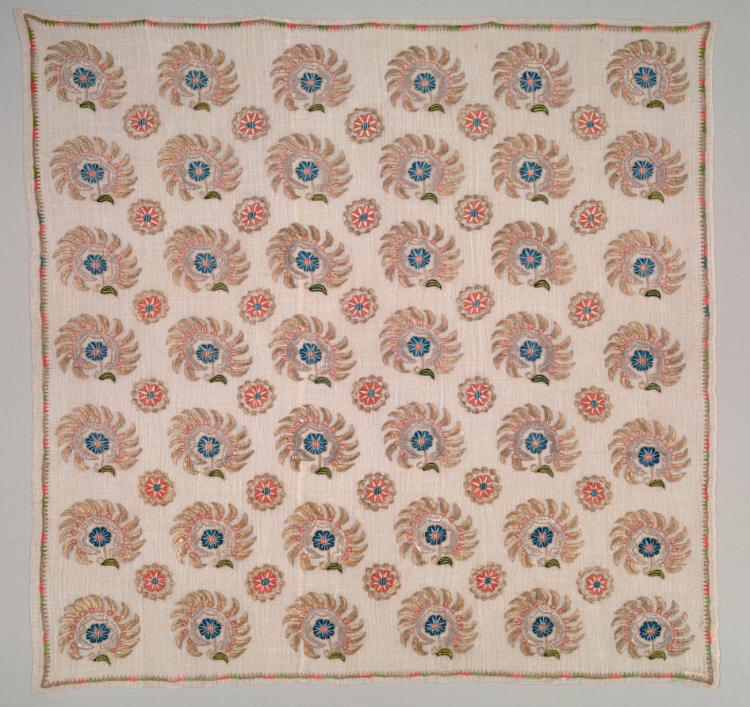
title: Embroidered Square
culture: Turkey, 19th century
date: 19th century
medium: embroidery: silk, gold and silver filé on linen tabby ground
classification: Embroidery